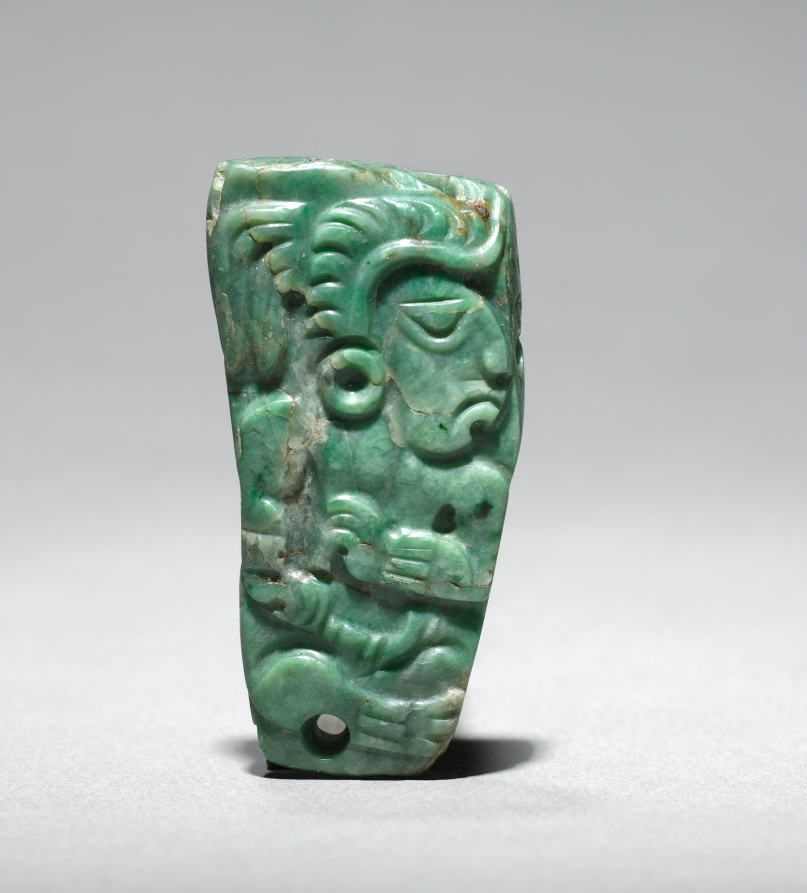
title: Ornament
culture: Mexico or Central America, Maya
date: 250–900 CE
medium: greenstone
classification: Sculpture